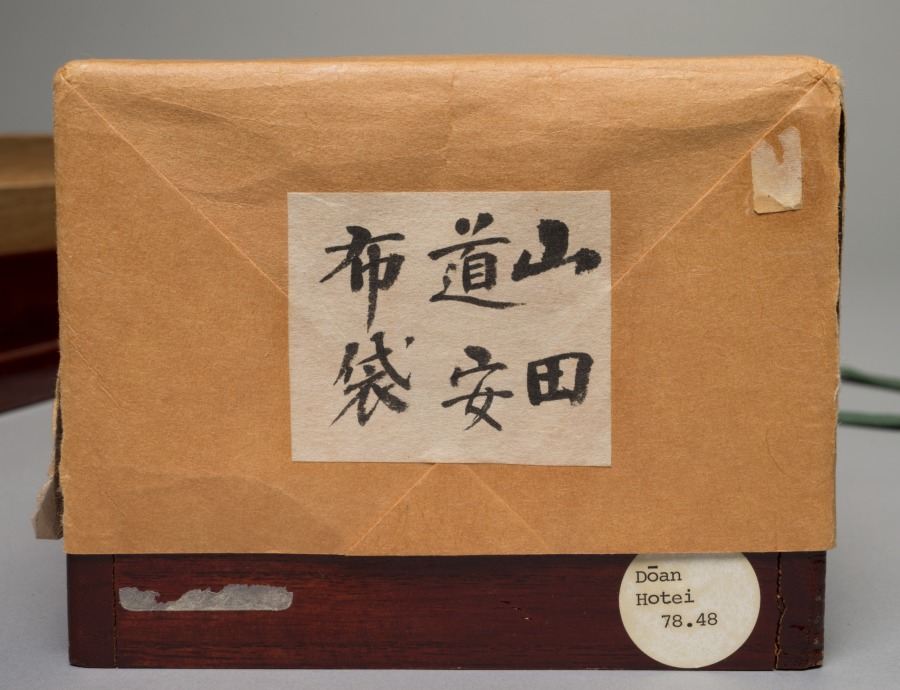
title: Hotei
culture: Japan, Muromachi period (1392–1573)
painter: Yamada Dōan I (Juntei) (Japanese, d. 1573)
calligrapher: Tōkei Jakurin (Japanese, dates unknown)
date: mid-1500s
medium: hanging scroll; ink on paper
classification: Painting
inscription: 桃渓道人 題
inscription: 大肚兮濶襟 寶聚嚢底沵 通霄別有路 勿向指尖尋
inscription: 落款 桃渓之印 若霖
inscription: 印章 山田氏道安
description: Hotei is a semilegendary figure who may have lived from the late 800s to the early 900s. He later became prominent in Chan (or Zen, in Japanese) Buddhist literature. He epitomizes the freewheeling figure outside the mainstream monastic system—in which people strive for enlightenment through prescribed methods—who nonetheless attains a high level of spiritual awakening. The inscription warns against seeking enlightenment by conscious effort: Big stomach, gaping garment, Treasures gathered deep in the bottom of his bag, Passing through the sky is another road, Do not seek that to which his fingertip points.